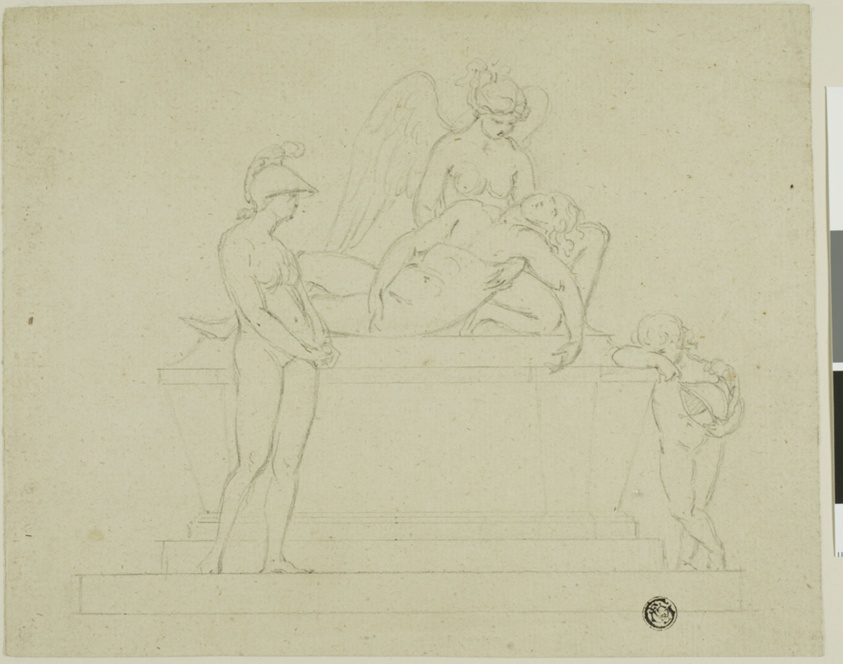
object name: Drawing and Watercolor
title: Project for a Tomb, Three Figures and an Angel (recto); Project for a Tomb: Three Figures and an Angel (verso)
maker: Possibly John Bacon, the elder (English, 1740-1799); or possibly John Michael Rysbrack (Flemish, 1693-1770)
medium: Black chalk (recot and verso) on cream laid paper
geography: England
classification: chalk; drawings (visual works); prints and drawing